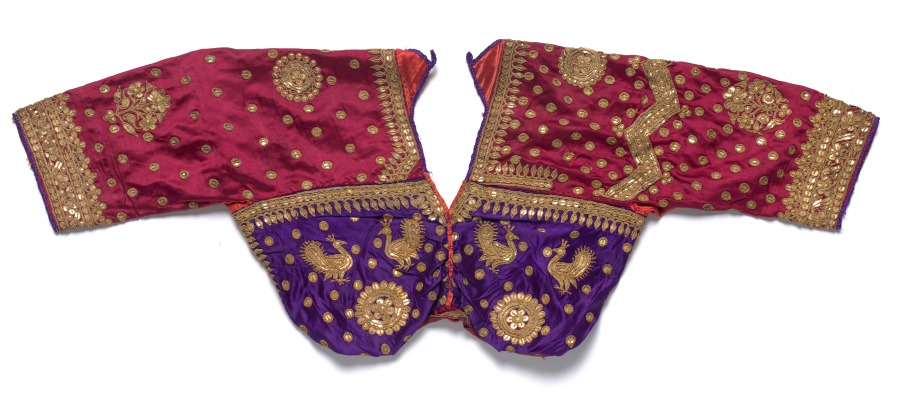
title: Bodice or Coli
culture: India, late 19th century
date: late 1800s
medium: embroidered satin with gold thread and sequins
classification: Garment